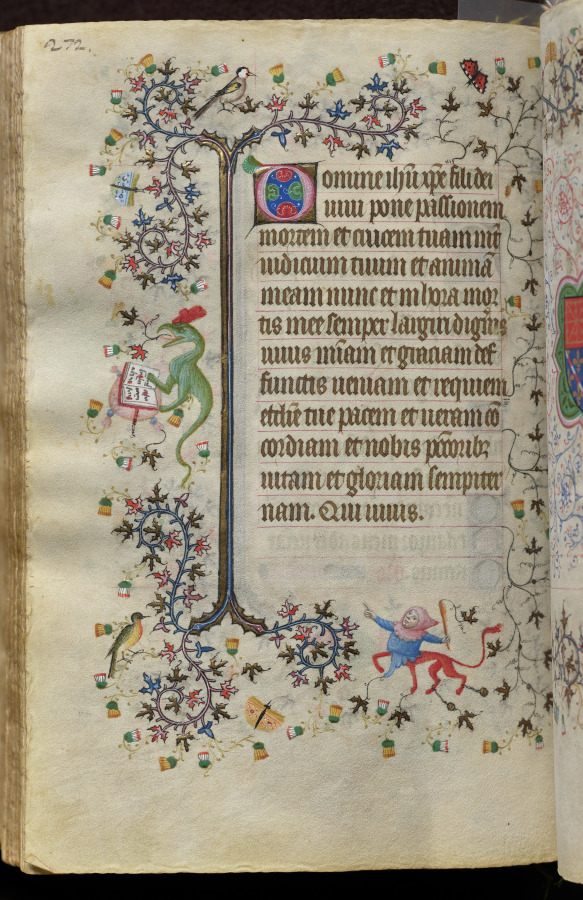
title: Hours of Charles the Noble, King of Navarre (1361-1425): fol. 136v, Text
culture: France, Paris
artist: Master of the Brussels Initials and Associates (French)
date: c. 1405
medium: ink, tempera, and gold on vellum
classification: Bound Volume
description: This precious volume was obviously highly prized by its owner, the French-born King of Navarre, who had his coat of arms painted on no less than twenty folios. Rather than directly commissioning this manuscript from a specific workshop, it seems that Charles the Noble acquired his book of hours -- perhaps ready-made for the luxury market -- while on a trip to Paris in 1404-05. A collaborative effort, six painting styles are evidenced within the pages of this codex, those of two Italians, two Frenchmen, and two Netherlanders. The painter who was responsible for the planning and decoration of the book, and who produced seventeen of the large miniatures, was a Bolognese artist known as the Master of the Brussels Initials. His principal assistant, responsible for most of the borders, was a Florentine who signed his name "Zecho" da Firenze on folio 208 verso.